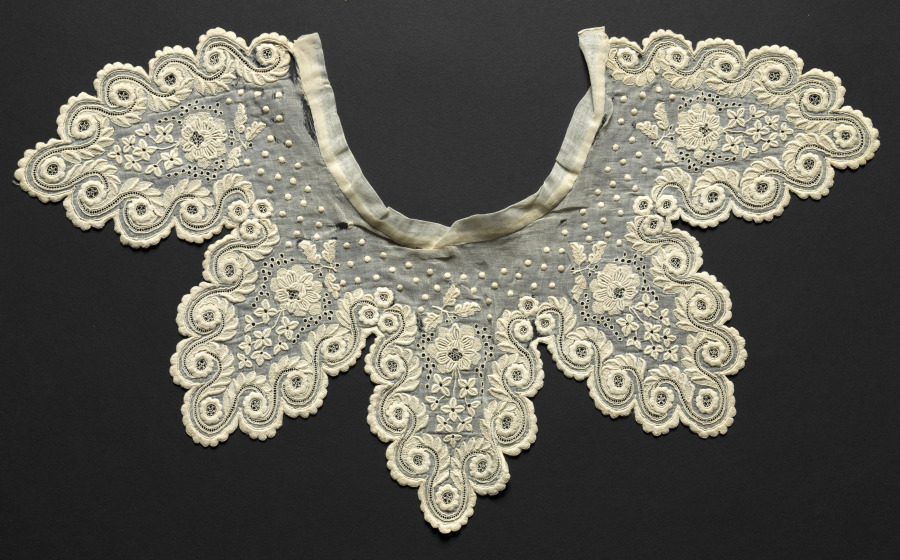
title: Lace and Embroidery Collar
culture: Madeira(?)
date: 1800s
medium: Plain weave linen or cotton(?): needle lace (cutwork) and embroidery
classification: Embroidery